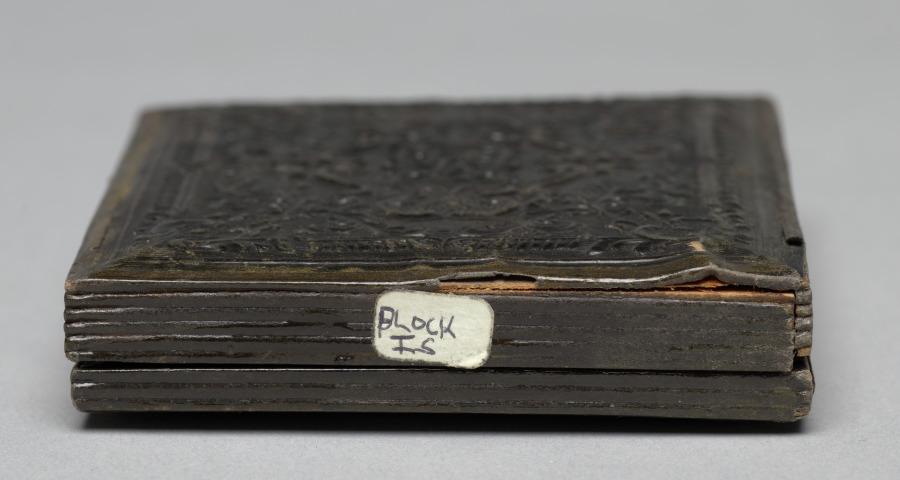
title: High Rock Tower and Stone Cottage, Lynn, Massachusetts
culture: America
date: c. 1862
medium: ambrotype, sixth plate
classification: Photograph